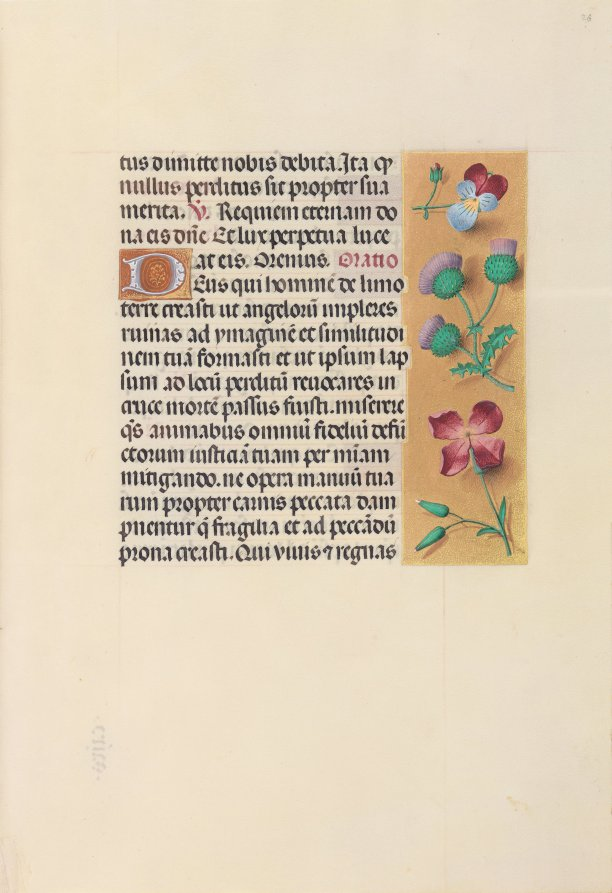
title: Hours of Queen Isabella the Catholic, Queen of Spain: Fol. 26r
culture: Flanders, Ghent and Bruges, late 15th century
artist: Master of the First Prayerbook of Maximillian (Flemish, c. 1444–1519)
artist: and Associates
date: c. 1500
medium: ink, tempera, and gold on vellum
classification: Bound Volume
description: A great lover of Flemish art, Queen Isabella treasured her many devotional books. This deluxe manuscript was created for her private devotions by highly organized and distinctly talented manuscript painters active in Ghent and Bruges. The Ghent-Bruges school represents the culmination of Flemish book painting, whose main features were the use of rich colors, illusionistic effects, a love of landscape, and a strong sense of visual narrative. Manuscripts produced by this circle of artists are renowned for their border decoration featuring a rich variety of realistically painted flowers, scrolling acanthus leaves, birds, and butterflies.